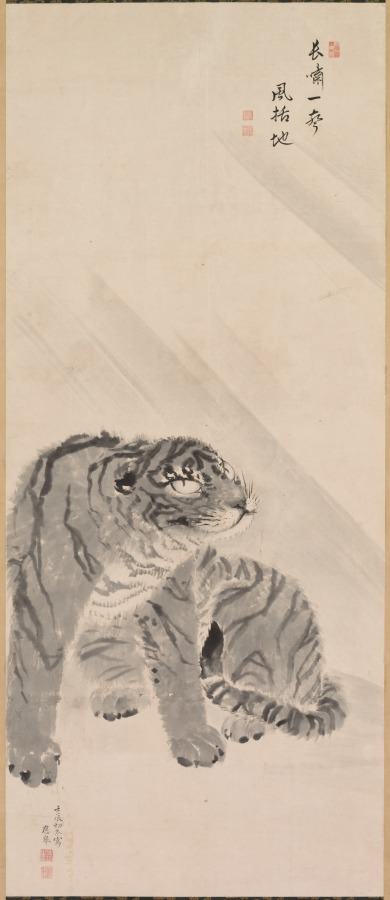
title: Tiger in Wind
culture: Japan, Edo period (1615–1868) to Meiji period (1868–1912)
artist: after Maruyama Ōkyo (Japanese, 1733–1795)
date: 1800s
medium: hanging scroll; ink on paper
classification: Painting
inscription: 「秋空一鶴」賛 長嘯一聲風括地「月渚」朱文方印「祐常之章」白文方印 壬辰初冬寫応挙 「應舉之印」白文方印・「仲選」白文方印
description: The seals appended to the inscription on this painting suggest that the text was brushed by Yūjō (1723–1773), an imperial prince who became a Buddhist monk and was abbot of Enman'in at Miidera. The line is from a poem attributed to a Yuan dynasty poet, Yu Ruyu (dates unknown), and describes the sound of a fierce wind lashing the ground. Wind is associated with the roar of the tiger. Yūjō was Maruyama Ōkyo's most important patron as a young artist, and this painting has a signature asserting that Ōkyo created it in 1772, the year before Yūjō's death. While Yūjō produced a preface for a now famous set of handscrolls he commissioned Ōkyo to paint, and a number of Ōkyo's compositions for Enman'in survive, this work would appear to be one imagining their relationship, as opposed to a genuine piece.